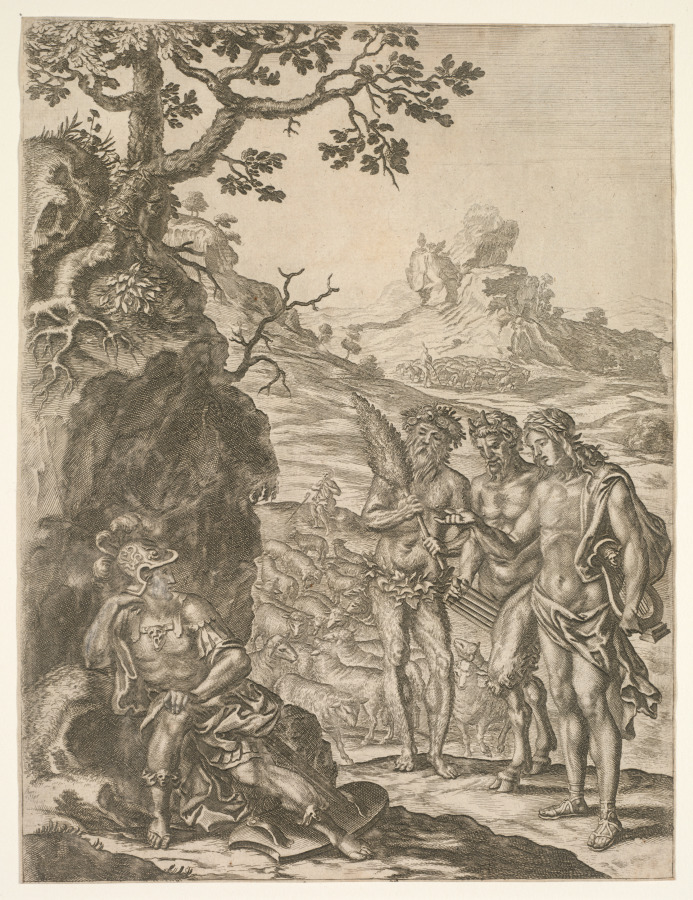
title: Aeneid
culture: France, 17th century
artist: Pierre Lombart (French, 1612–1682)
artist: after Francis Cleyn (German, 1582–1658)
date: 1658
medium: engraving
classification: Print